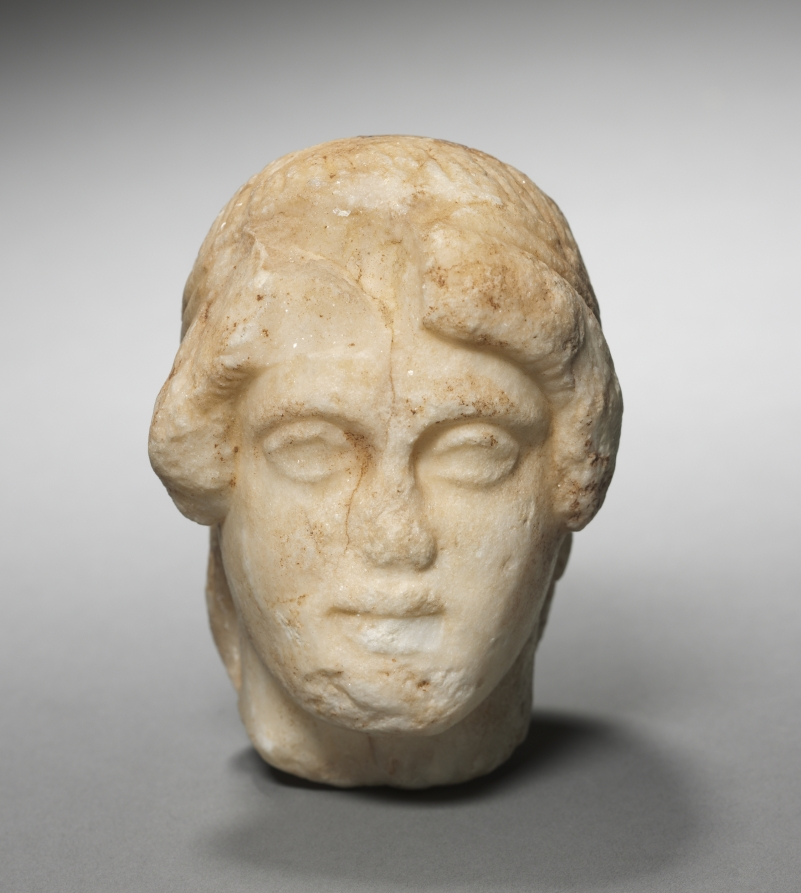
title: Head of a Kore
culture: Greece, Amorgos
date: c. 480–460 BCE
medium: marble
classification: Sculpture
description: This small head probably once belonged to a full-body statuette of a young woman, a miniature of the Archaic Greek kore statue type. She has heavily lidded eyes and wears a double-banded fillet around her hair. The face and front of the hair are damaged and weathered. A statuette such as this one was likely made as a votive gift to a goddess.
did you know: Kore,which means maiden, is also another name for the Greek goddess Persephone.